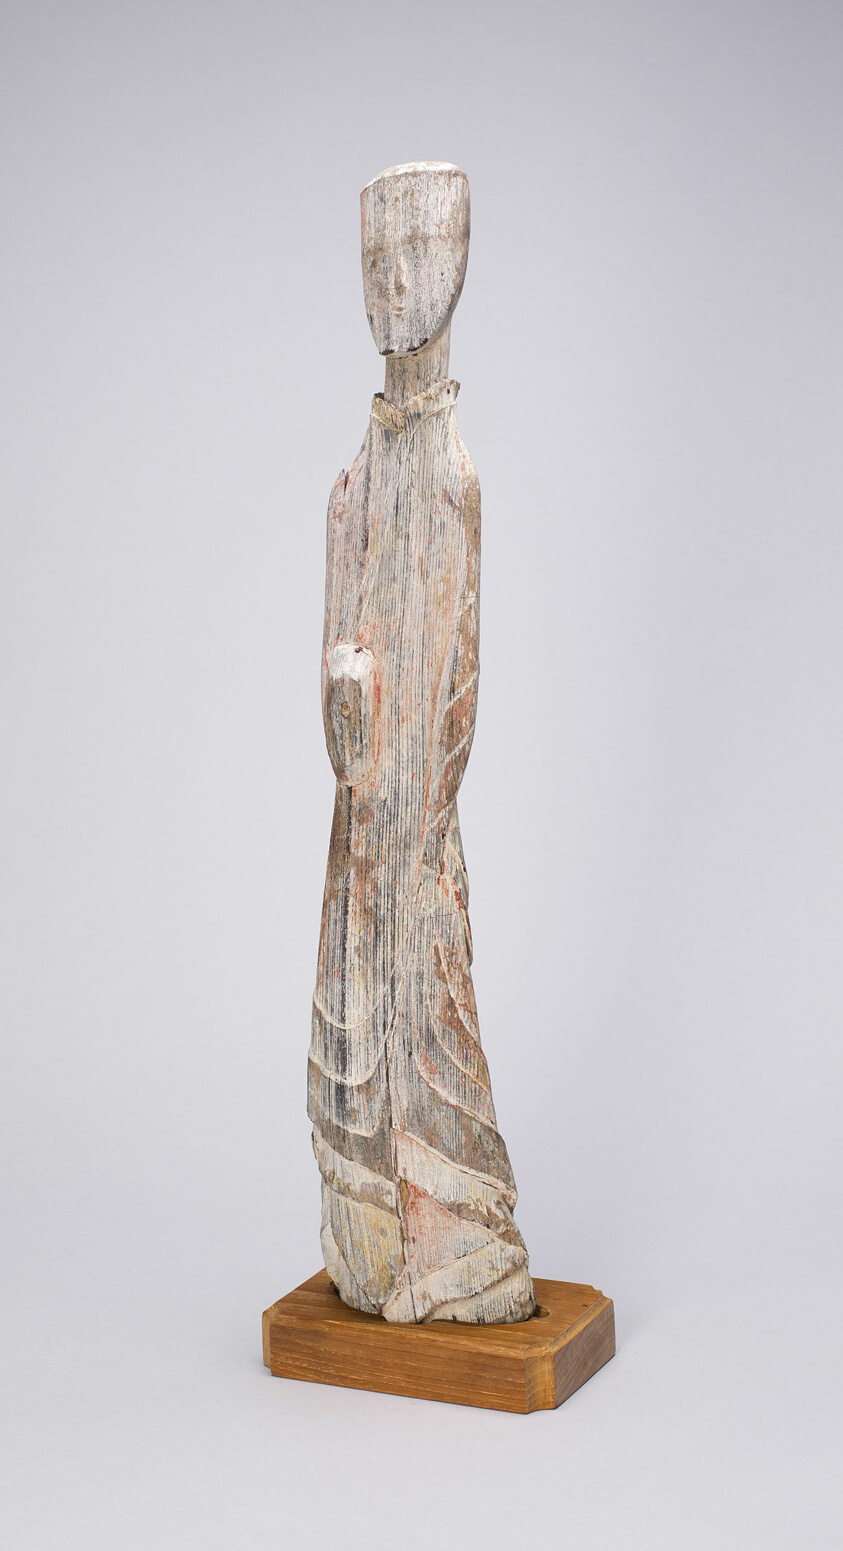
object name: Sculpture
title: Standing Attendant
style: Chinese (culture or style)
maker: China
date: Warring States period (480–221 BCE), 4th or 3rd century BCE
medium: Wood with traces of polychrome pigments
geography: China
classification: wood; sculpture; asian art